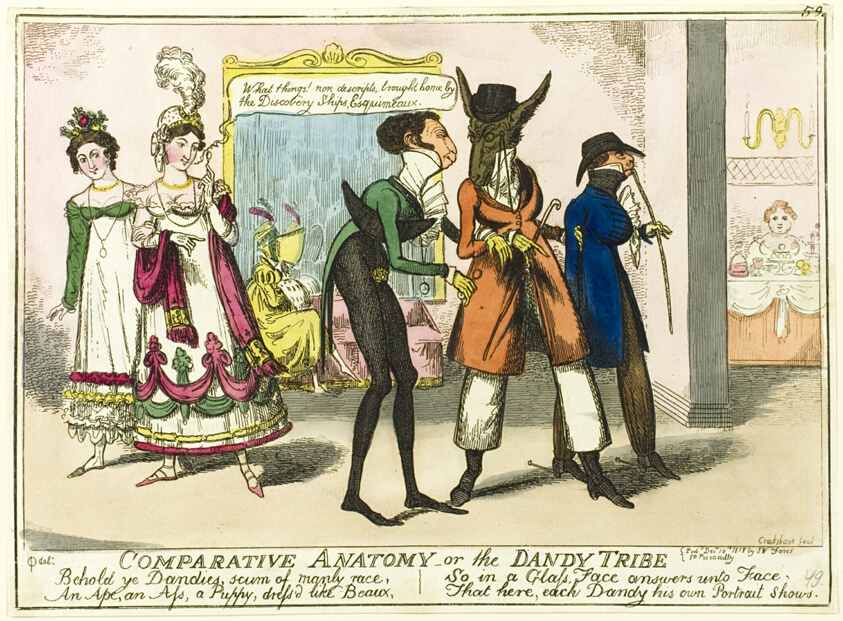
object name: Print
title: Comparative Anatomy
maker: Isaac Robert Cruikshank (English, 1789-1856); published by S.W. Fores (English, 1761-1838)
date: published December 10, 1818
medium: Hand-colored etching on paper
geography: England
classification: etching; print; prints and drawing